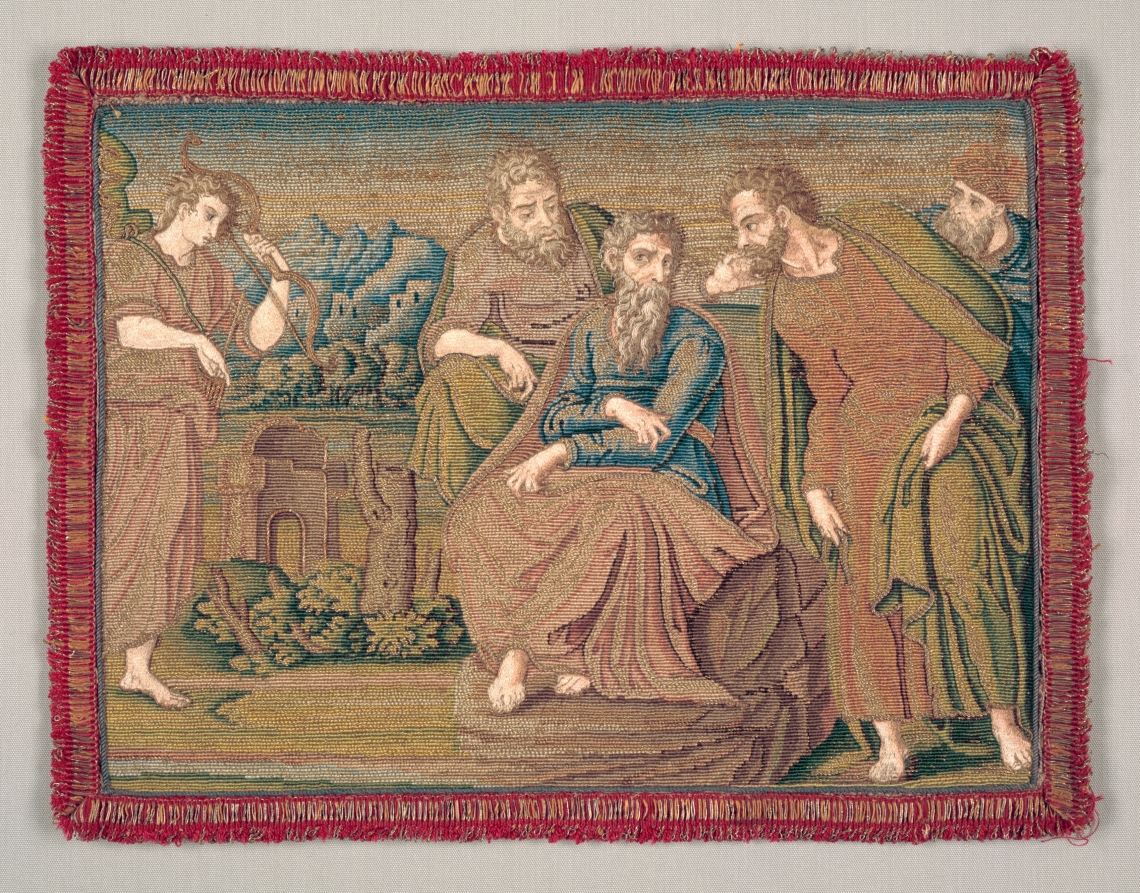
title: Apparel from a Dalmatic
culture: Italy, Florence, 16th century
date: 1500s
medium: Silk, gold thread; embroidery: or nué (shaded gold)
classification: Embroidery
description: The artist who drew this pattern created expressive facial features that a master embroiderer conveyed with silk stitches. That high level was probably achieved by an embroiderer specializing in faces, hair, and skin. The draped clothing was created by varying the density of silk thread crossing over the gold thread. Embroidered scenes in rectangular panels, known as apparel, were made with luxurious thread to decorate tunic-shaped ecclesiastical garments, or dalmatics. An apparel was placed at the ends of sleeves, as seen in a nearby example, and on the front and back above the hem.